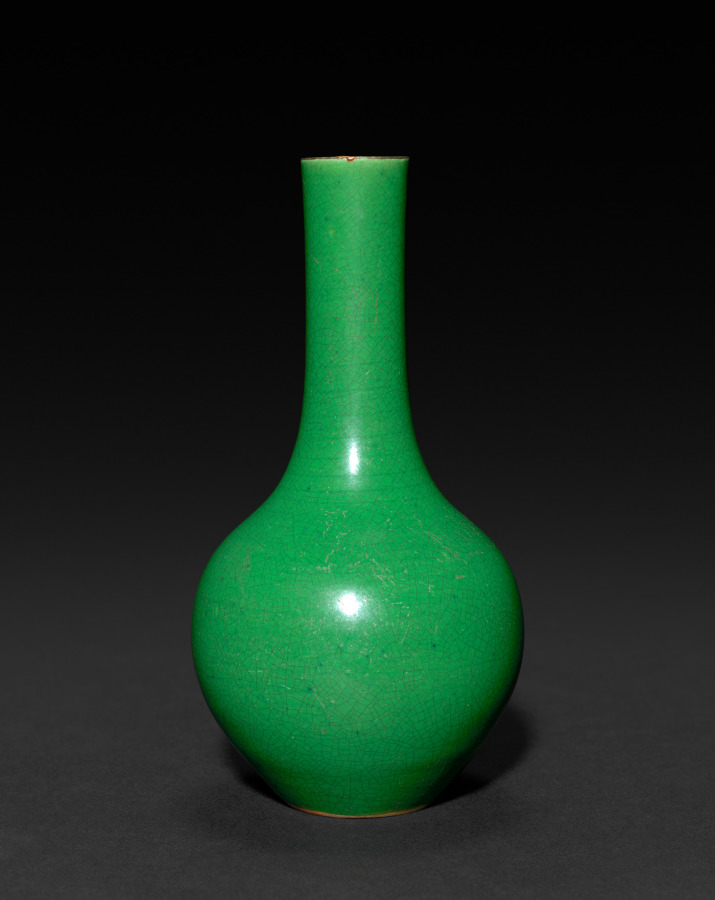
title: Bottle-Shaped Vase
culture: China, Qing dynasty (1644–1911), Qianlong reign (1736–95)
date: 1736–95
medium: porcelain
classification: Ceramic